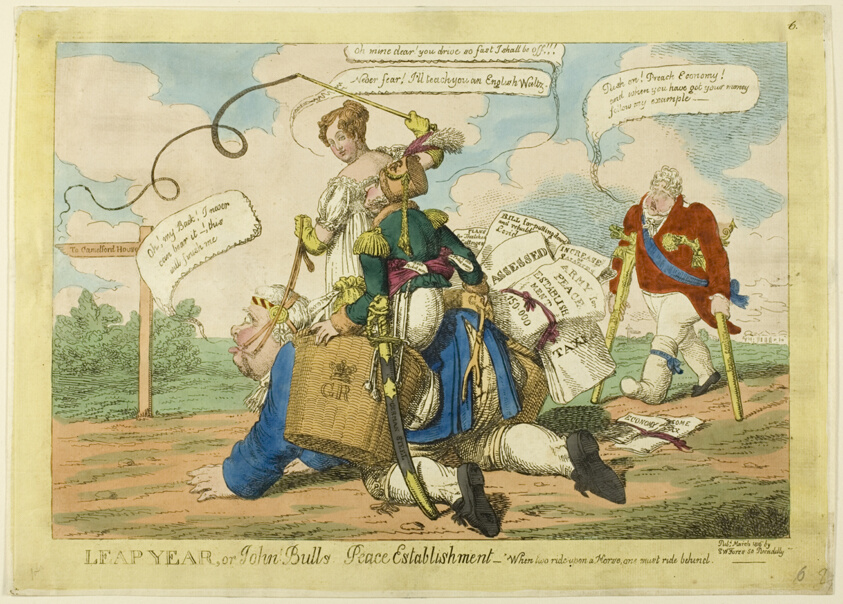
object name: Print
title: Leap Year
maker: Charles WIlliams (English, active 1797-1830); published by S. W. Fores (English, active 1785-1825)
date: published March 1816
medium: Hand-colored etching on paper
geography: England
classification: etching; print; prints and drawing